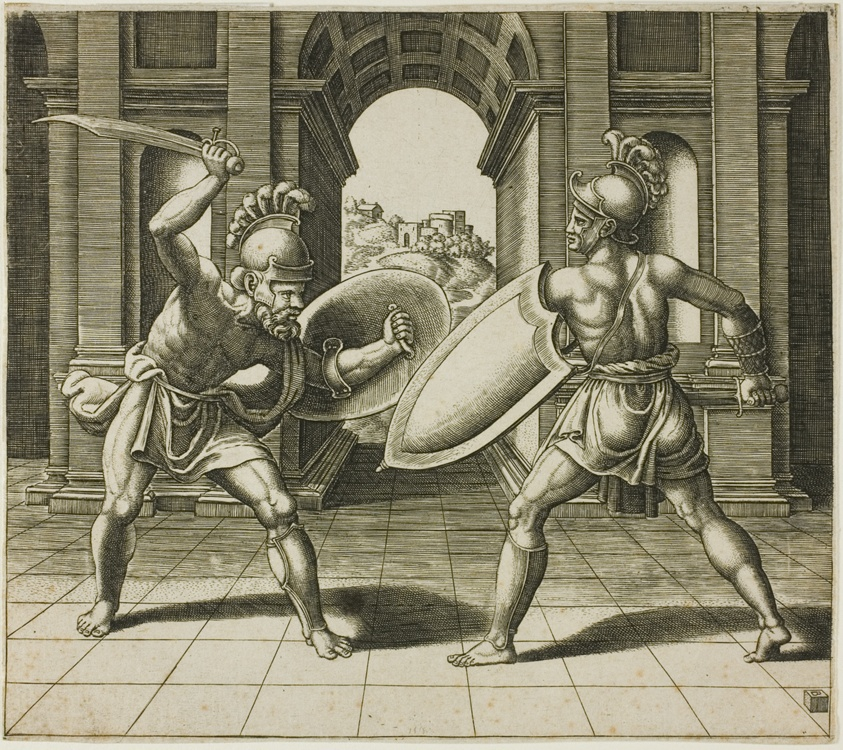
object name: Print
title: The Two Gladiators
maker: Master of the Die (Italian, active c. 1530–1560); After Giulio Romano (Italian, c. 1499–1546)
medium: Engraving in black on cream laid paper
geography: Italy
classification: print; prints and drawing